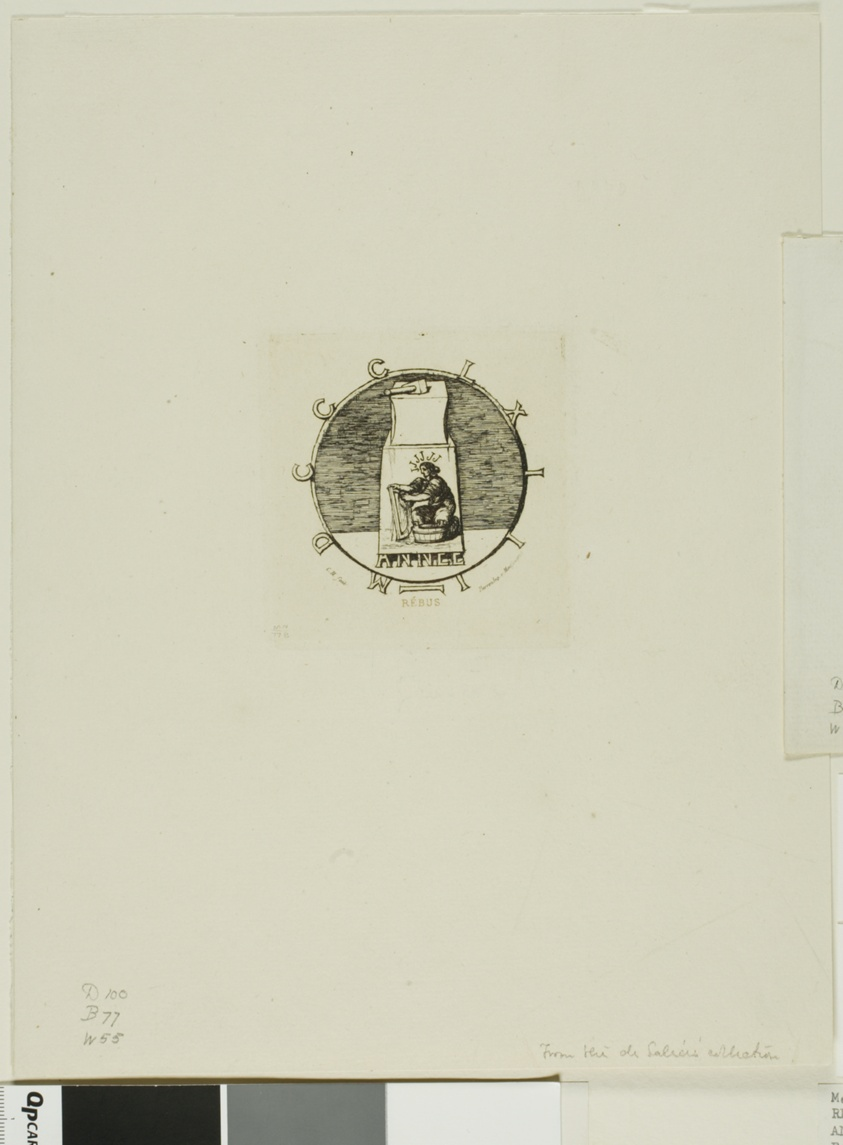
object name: Print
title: Rebus: Here Lies the Ancient Vendetta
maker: Charles Meryon (French, 1821-1868); printed by Pierron (French, 19th century)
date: 1862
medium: Etching with engraving in warm black with the title printed à la poupée in red ink on cream laid paper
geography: France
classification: etching; print; prints and drawing